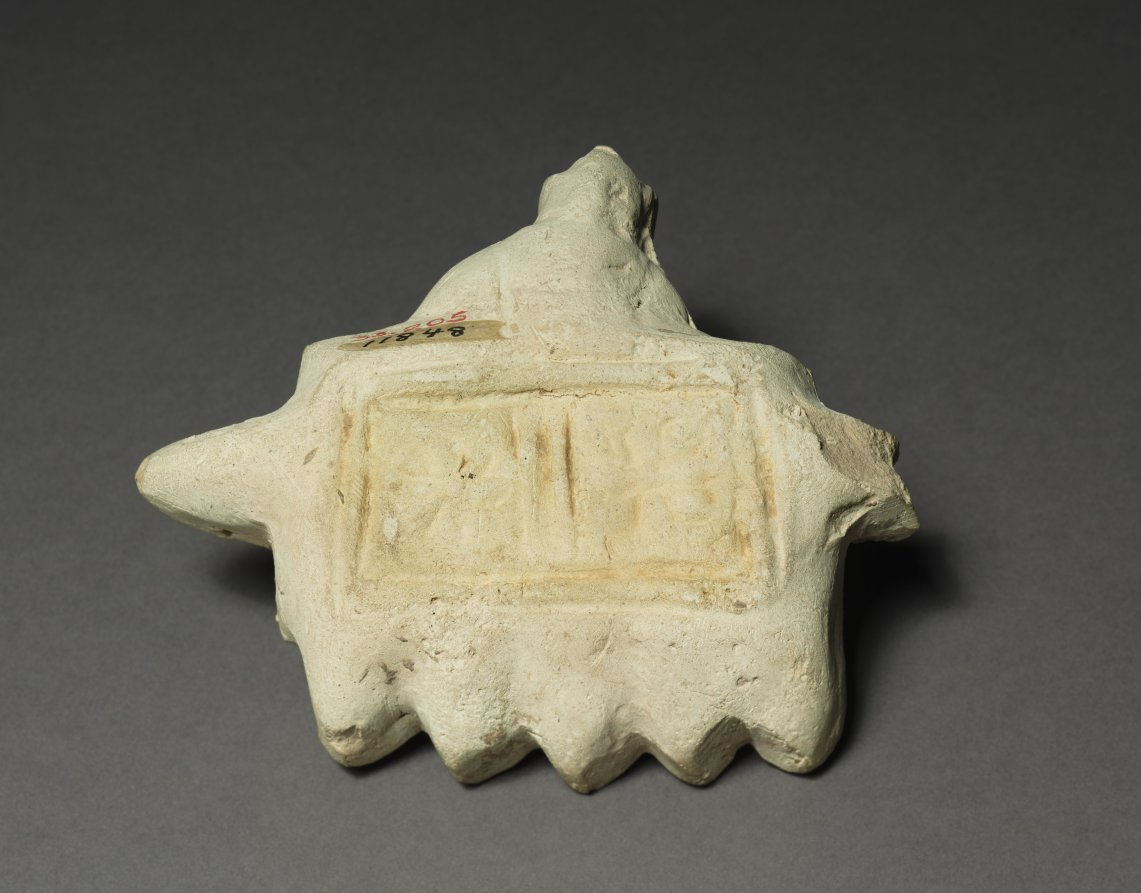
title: Five Burner Lamp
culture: Parthian Empire (247 BCE–224 CE)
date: 1–200 CE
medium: terracotta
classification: Ceramic